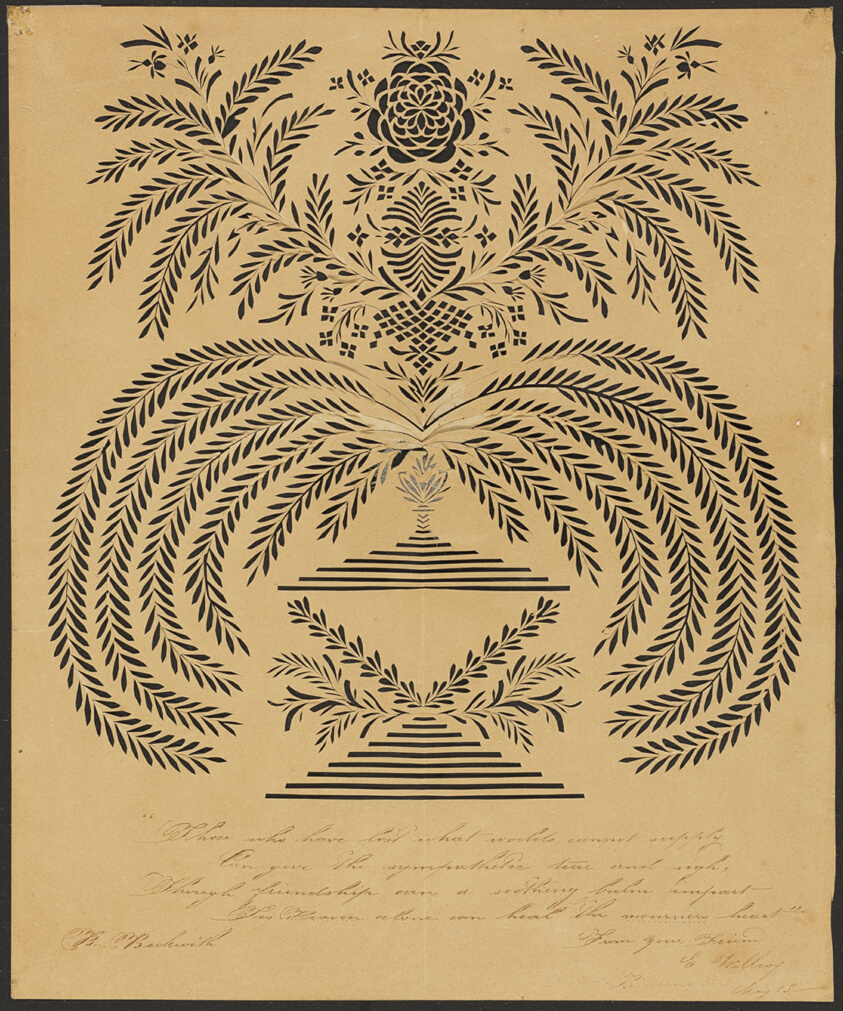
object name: Print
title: A Condolence Card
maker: Emily Wilcox (American, 19th century)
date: c. 1830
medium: Stencil in black on buff wove paper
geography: United States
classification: stencil; print; prints and drawing